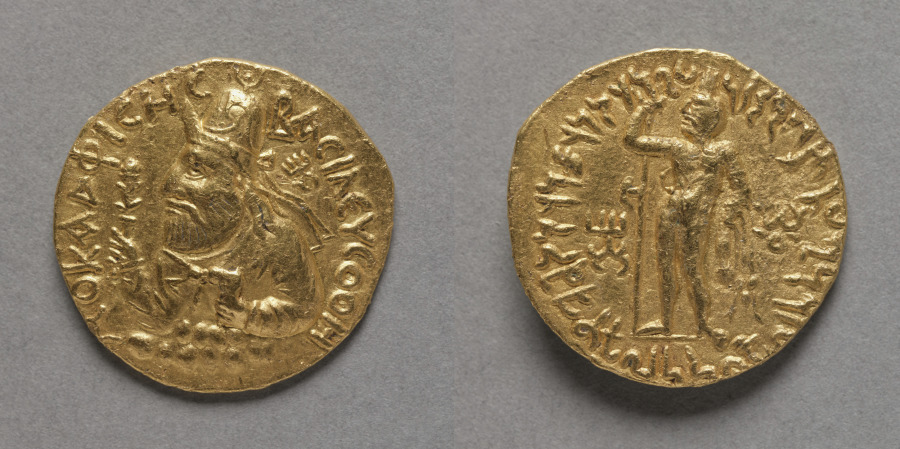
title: Coin of Kushan King Vima Kadphises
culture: India, Mathura, Kushan period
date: 100–200s CE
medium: gold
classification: Coins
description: This gold coin represents the reigns of the Kushana ruler, Vima Kadphises. The coin bears a portrait of the ruler on the obverse and various deities on the reverse. It is identified by an inscription in Kharosthi, the language used in northwestern India during the Kushan period. The reverse depicts the figure of Hercules with the skin of the Nemean lion draped over his forearm and the lion's scalp also worn over his head. The Kushans primarily identified with Zoroastrian religious practice, but imagery on their coins and the religious groups they sponsored suggest they were ecumenical--open to supporting a wide range of sects.